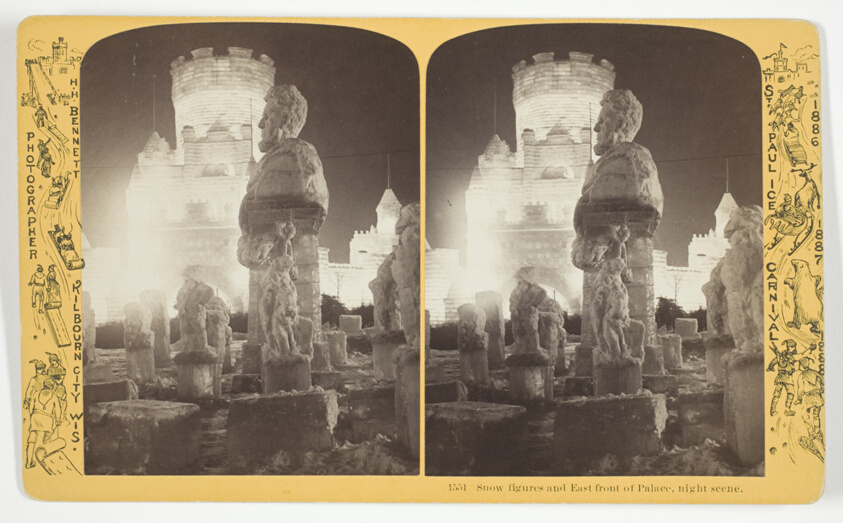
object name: Photograph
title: Snow figures and East front of Palace, night scene, No. 1551 from the series "St. Paul Ice Carnival"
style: 19th century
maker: Henry Hamilton Bennett (American, born Canada, 1843-1908)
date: 1886/88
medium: Albumen print, stereo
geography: Wisconsin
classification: photography; photograph; albumen silver print; stereograph (albumen)